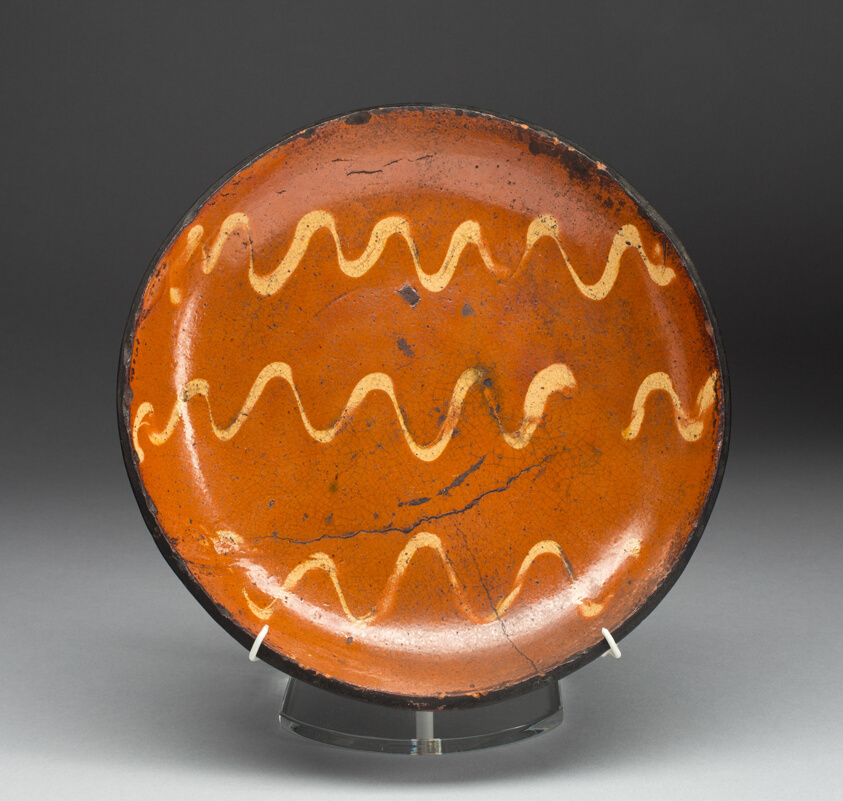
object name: Decorative Arts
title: Plate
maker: Artist unknown (American, 18th–19th century); New England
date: 1790–1860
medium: Earthenware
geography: New England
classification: plate (general, dish); earthenware; dish (vessel); american decorative arts; american arts; ceramics; decorative arts